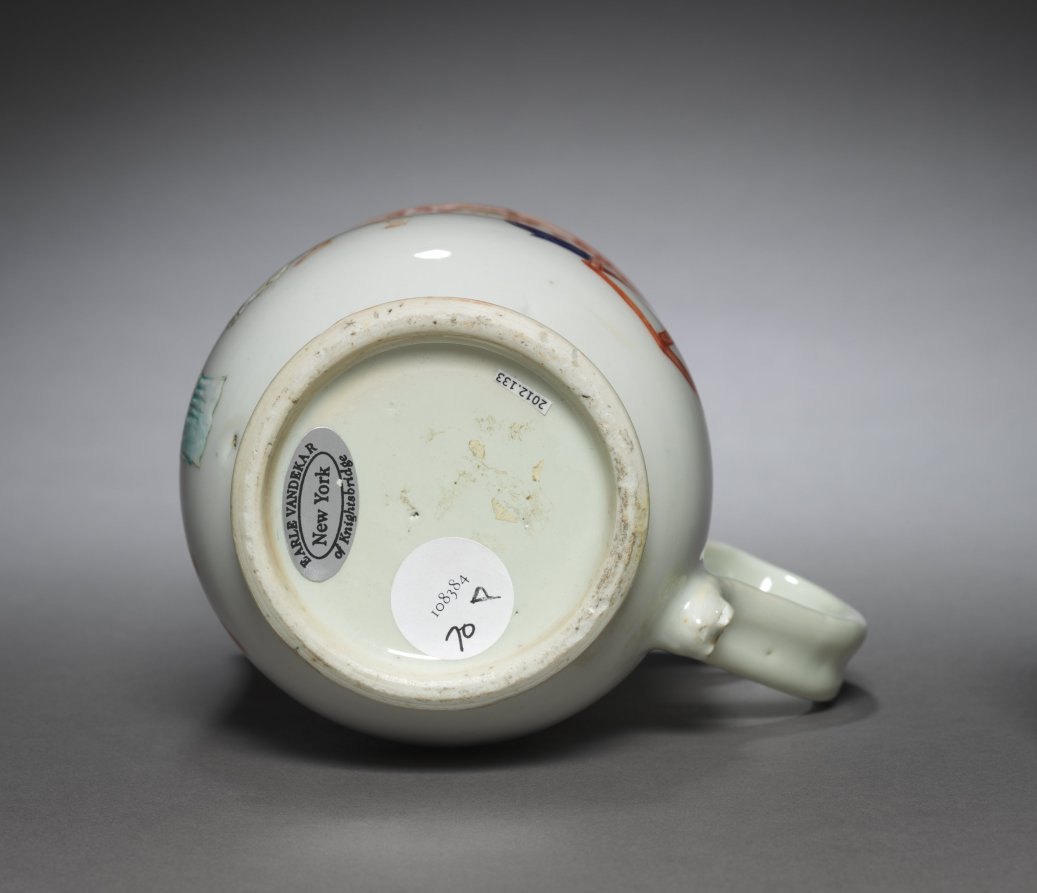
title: Tankard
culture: England, 18th century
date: 1765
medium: ceramic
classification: Ceramic